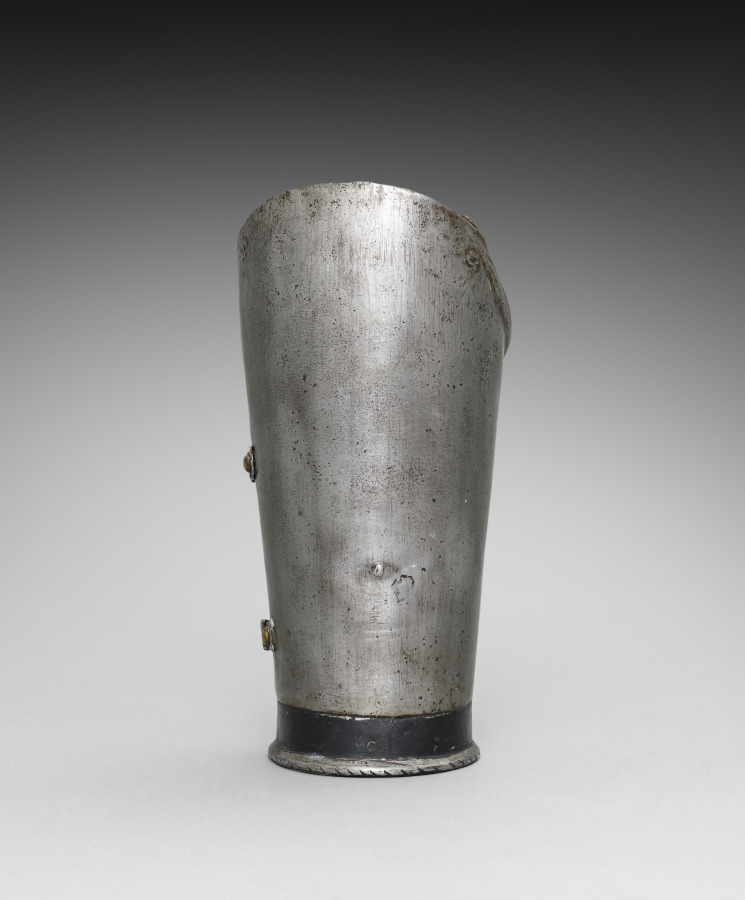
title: Left Vambrace (lower cannon)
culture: Germany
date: c.1550–1570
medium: iron, steel, leather and brass rivets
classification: Arms and Armor